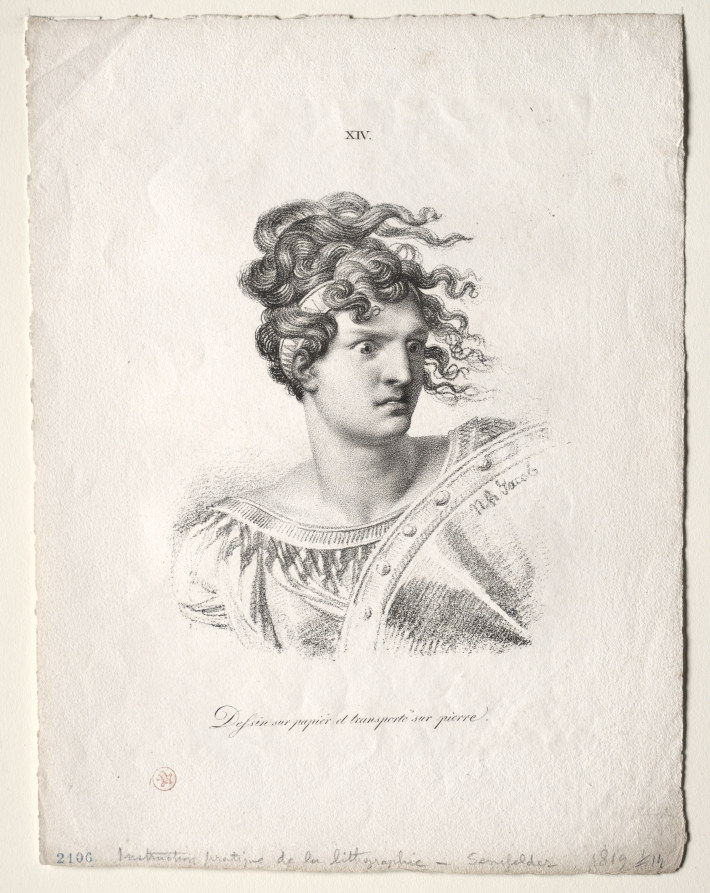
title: L'art de la lithographie: Head of an Amazon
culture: Germany, 19th century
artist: Alois Senefelder (German, 1771–1834)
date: 1819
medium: lithograph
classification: Print